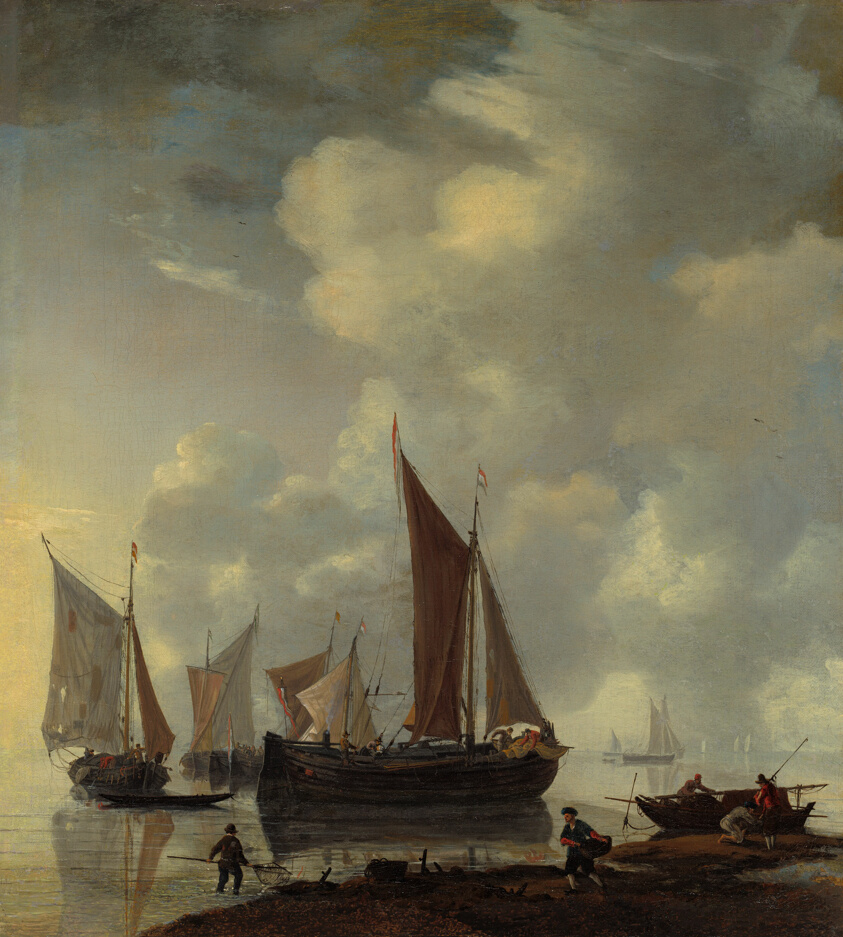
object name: Painting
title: Coast Scene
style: 17th Century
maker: Attributed to Reinier Zeeman (Reinier Nooms; Dutch, c. 1623-c. 1668)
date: mid–17th century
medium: Oil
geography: Netherlands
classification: oil paintings (visual works); paint; dutch; painting; european painting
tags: boats, boatman, men, water, coasts, sails, clouds, sky, net, flags, ropes, sailing, coastal scenes, seascapes